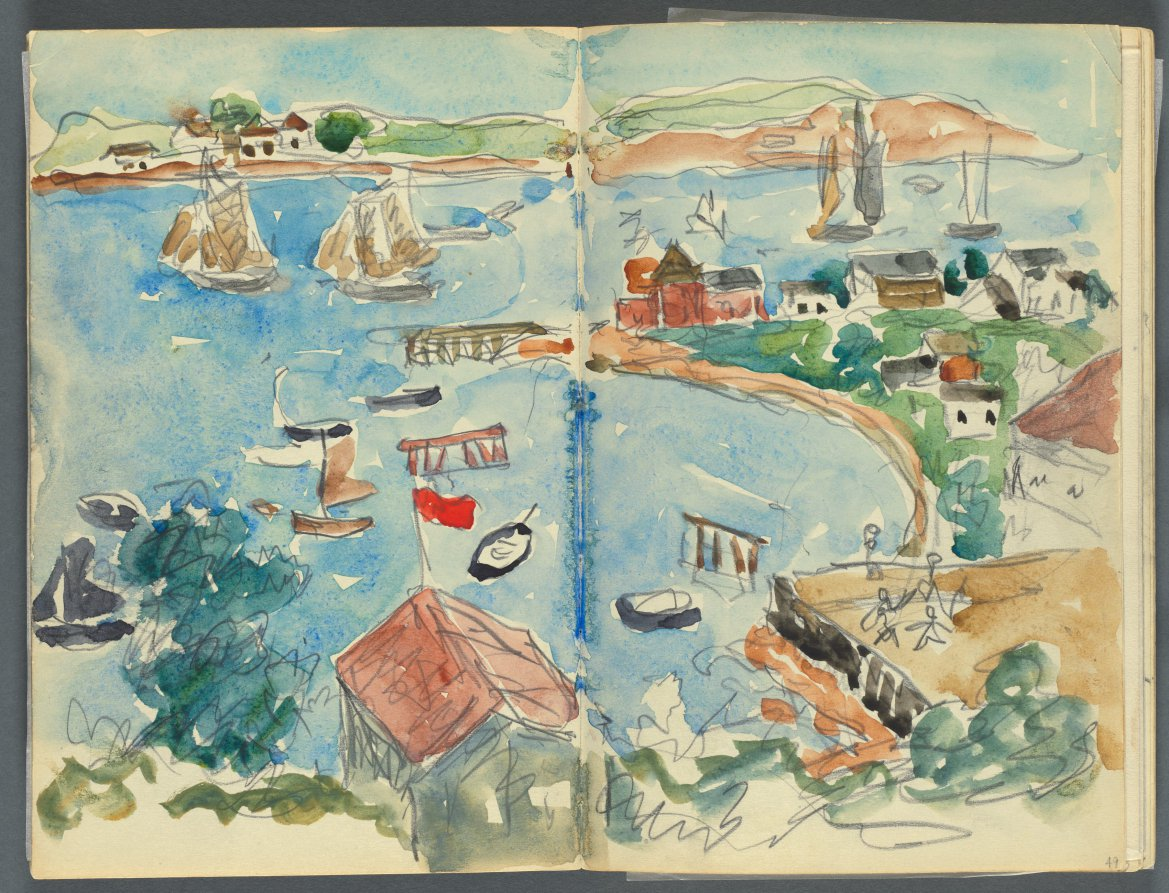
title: Sketchbook, The Dells, N° 127, page 048 & 49: View of a Cove from above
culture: America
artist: Maurice Prendergast (American, born Newfoundland [now Canada], 1858–1924)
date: c. 1919–1921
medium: graphite and watercolor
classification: Bound Volume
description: This sketchbook contains 59 pages of graphite drawings and 16 watercolors made at various locations on Cape Ann, Massachusetts.